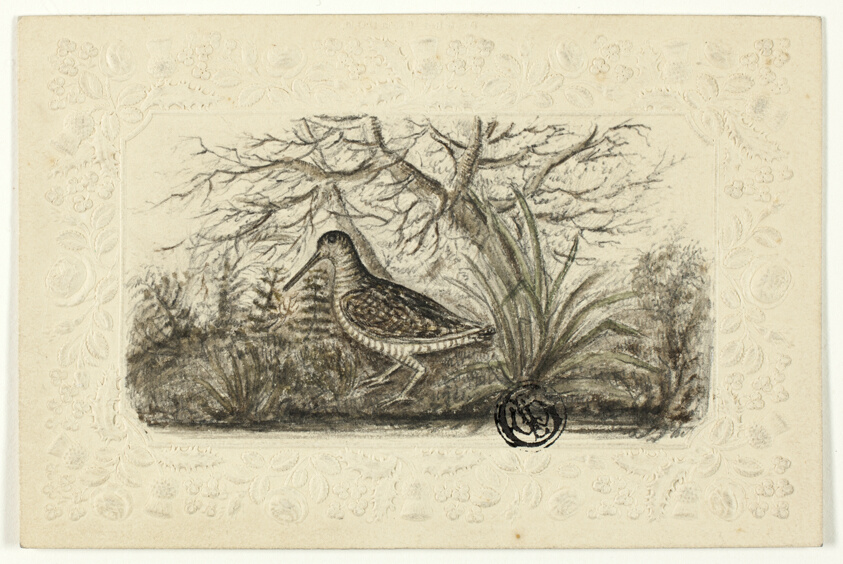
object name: Drawing and Watercolor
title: Grouse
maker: Henry LeJeune (English, 1819-1904)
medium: Brush and brown wash over graphite, on buff wove card, with embossed border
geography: England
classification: ink or chalk wash; drawings (visual works); prints and drawing